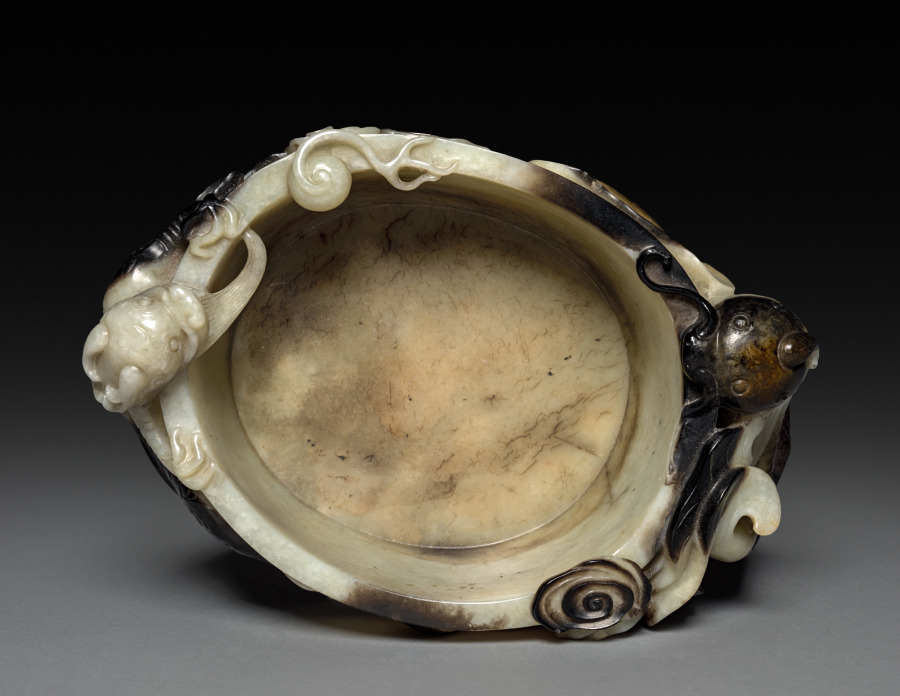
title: Dish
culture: China, Ming dynasty (1368–1644)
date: 1368– 1644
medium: jade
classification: Jade